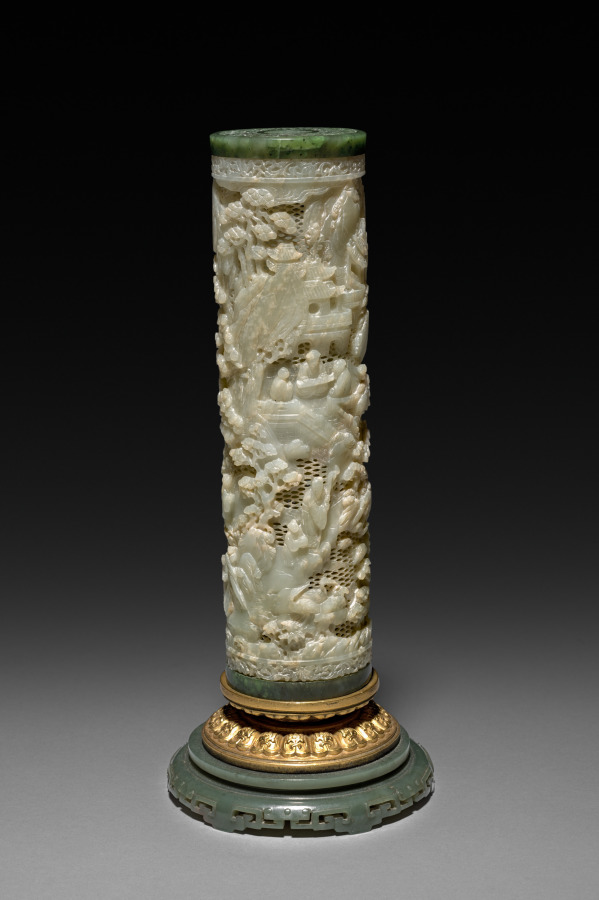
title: Cylinder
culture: China, Qing dynasty (1644-1911) or Republican period (1912-49)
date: 1800–1940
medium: jade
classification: Jade